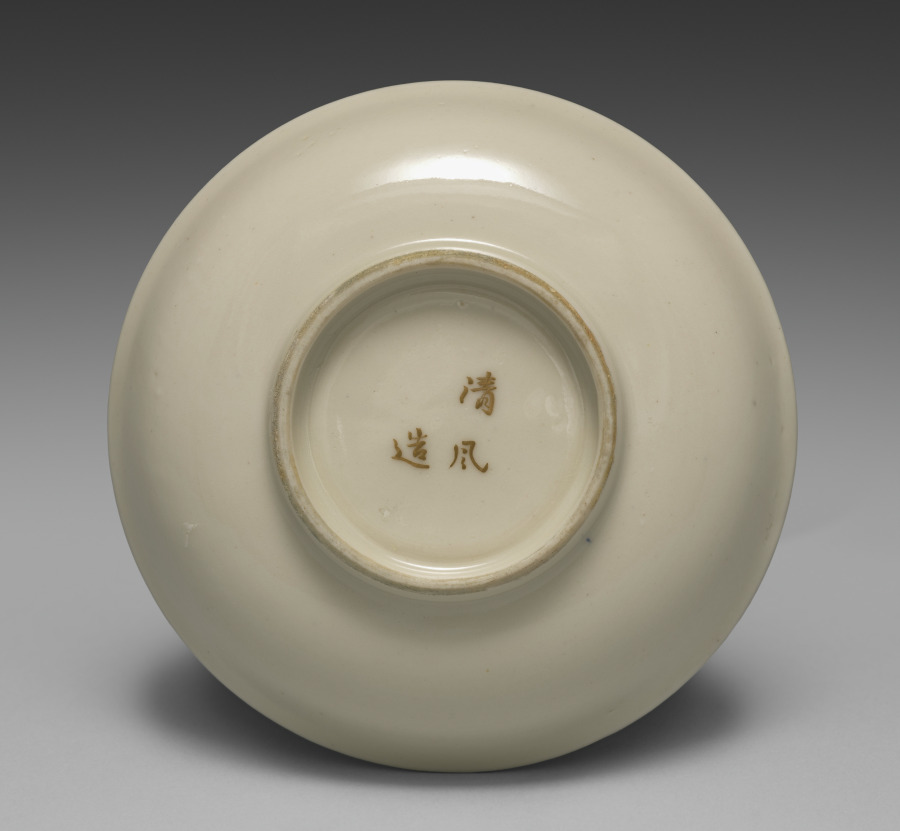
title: Small Dish from Dining Set with Plum Blossoms and Cracked-Ice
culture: Japan, Meiji period (1868–1912)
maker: Seifū Yohei II (Japanese, 1844–1878)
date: c. 1875–78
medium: Porcelain with molded designs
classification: Ceramic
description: Each item in this set has a delicate low-relief design of flowering plum branches over scattered, intersecting lines meant to resemble the cracked-ice surface of a frozen body of water and is signed on the base in gold pigment. While Yohei II produced many fine works in underglaze blue, like those produced by Kiyomizu Shichibei, he also made works in quite different styles later in his career, from the early 1870 s. In 1873, he was appointed purveyor to the Industrial Center of Kyoto Prefecture, a designation associated with Kyoto’s efforts to reach an international market through the port of Kobe; and from 1875 until his death, he was involved in national-level projects to present Japanese ceramics across the world. It was during this period that Yohei III was apprenticed to Yohei II, and it has been suggested that this set may in fact be an early example of Yohei III’s work, which he signed with his teacher’s name. Decorated with flowers resembling Japanese textile motifs, the set calls to mind the design of Yohei II’s pair of vases with plum blossoms in the Victoria and Albert Museum. Here, the elaborate trees created for a formal public exhibition setting have been translated into the approachable blossoms of the genteel domestic environment. While the designs are consistent across the pieces, each raised flower petal and pistil and each incised line in the ice was done by hand, so the cups, bowls, and dishes are similar yet unique. The bottoms of two boxes once identified the set’s owner, but the information has been deliberately obscured with black ink. However, inscriptions still visible appear to indicate two occasions, once at the end of July 1886 , and once again in June 1916 , when parts of the set were requested from Hokura in Niigata Prefecture. The location corresponds to a neighborhood in the present-day city of Jōetsu. The surname Tsuji 辻 also appears on a paper tag affixed to one of the box cloths. Future research may possibly reveal more about their provenance. A vase by Yohei III in a private collection combines the formal grandeur of the Yohei II vases in the Victoria and Albert Museum with the gentler design of this dining set, placing flowering plum trees against soft, scalloped-edge clouds resembling those in golden screens.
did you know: The dining wares have a creamy white coloration that the four boxes containing them identify as Korean in style.